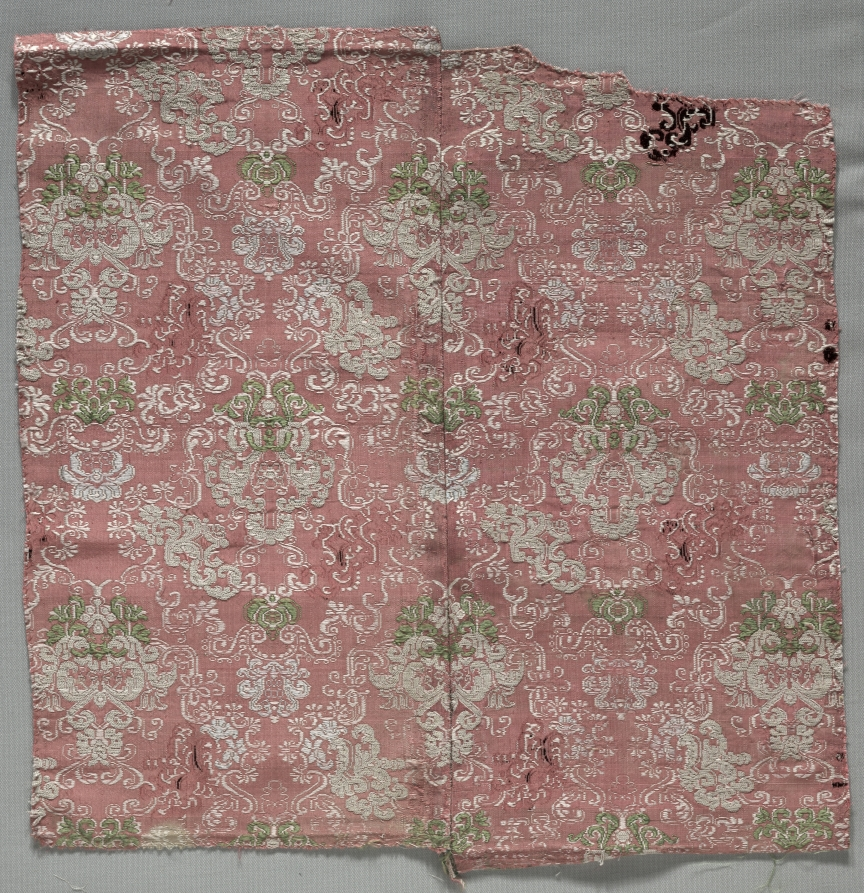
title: Silk Fragment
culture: Italy, 17th century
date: 1600s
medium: lampas weave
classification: Textile